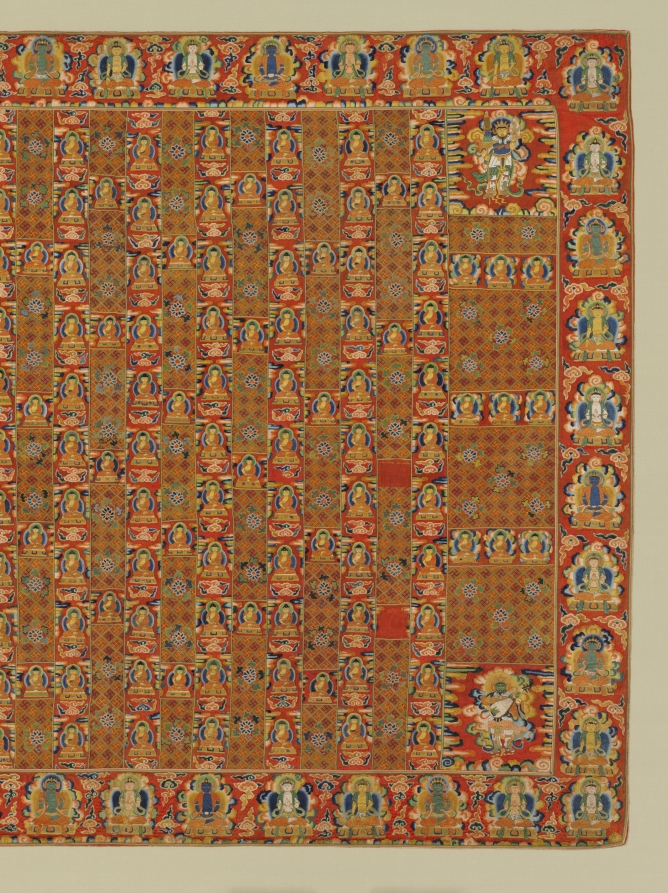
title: Buddhist Priest's Ceremonial Robe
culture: China, Ming dynasty (1368–1644)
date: 1400s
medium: silk and gold thread; embroidery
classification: Garment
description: This example of imperial embroidery is one of the earliest surviving Chinese Buddhist robes (kasaya) in the West. Depicting 991 Buddhas, each slightly different, it is constructed out of patches in reference to the legend in which the Buddha's favorite disciple divided a robe he was given into 30 pieces. Patchwork is also a sign of humility. Multiple Buddha images known as “thousand Buddha” designs are seen painted and sculpted on the walls of cave temples in India, Afghanistan, Central Asia, and China, but are rare on garments. The Four Heavenly Kings, guardians of the four directions, occupy the textile’s corners. When draped around the body, the inverted figures in the upper left corner appear right side up. Robes with 25 columns were worn by the highest-ranking clergy on ceremonial occasions.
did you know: The Five Transcendent Buddhas, who symbolize the purity of the five elements, are repeated around the edges.